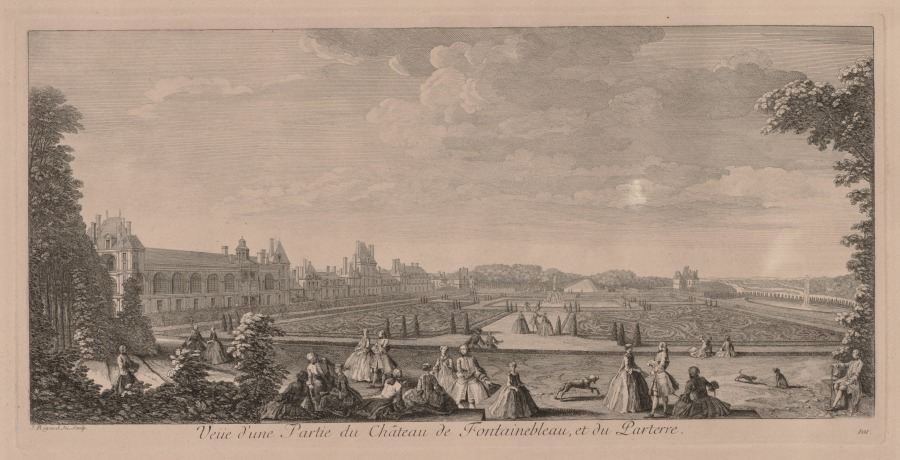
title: Chateau Fontainebleau and Gardens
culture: France, 18th century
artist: Jacques Rigaud (French, 1681–1754)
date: c. 1720–50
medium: engraving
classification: Print